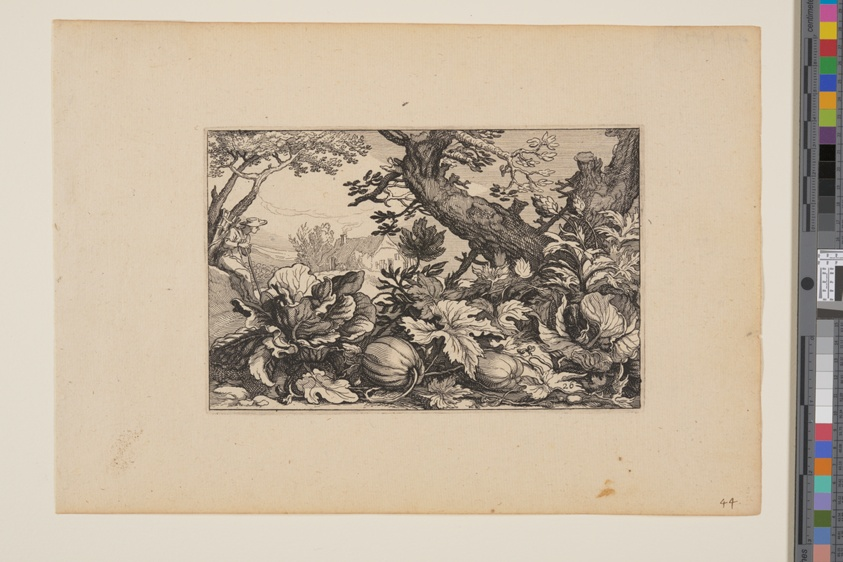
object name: Print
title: Tree and Melons, from Landscapes (Verscheyden aerdige Lanthuysen...)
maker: Claes Jansz. Visscher (Netherlandish, c. 1550–c. 1612); after Abraham Bloemaert (Dutch, 1566–1651)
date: 1620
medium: Etching on ivory laid paper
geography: Netherlands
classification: print; paper; prints and drawing; etching